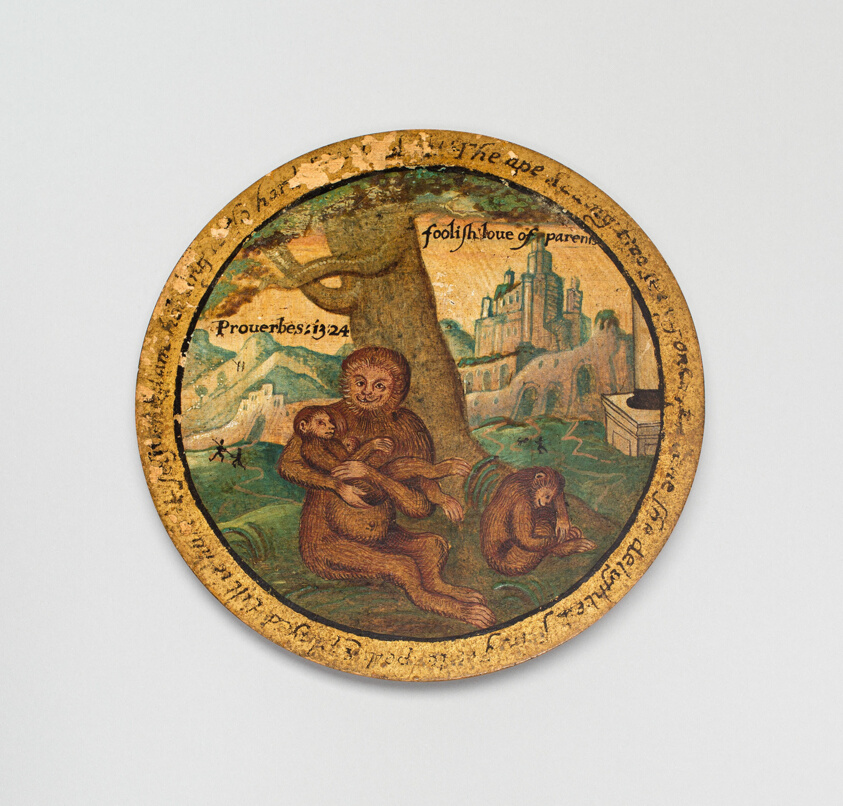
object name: Decorative Arts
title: Trencher with a Scene from Aesop's Fables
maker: England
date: c. 1600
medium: Sycamore, painted and gilded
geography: England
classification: wood; european decorative arts; decorative arts